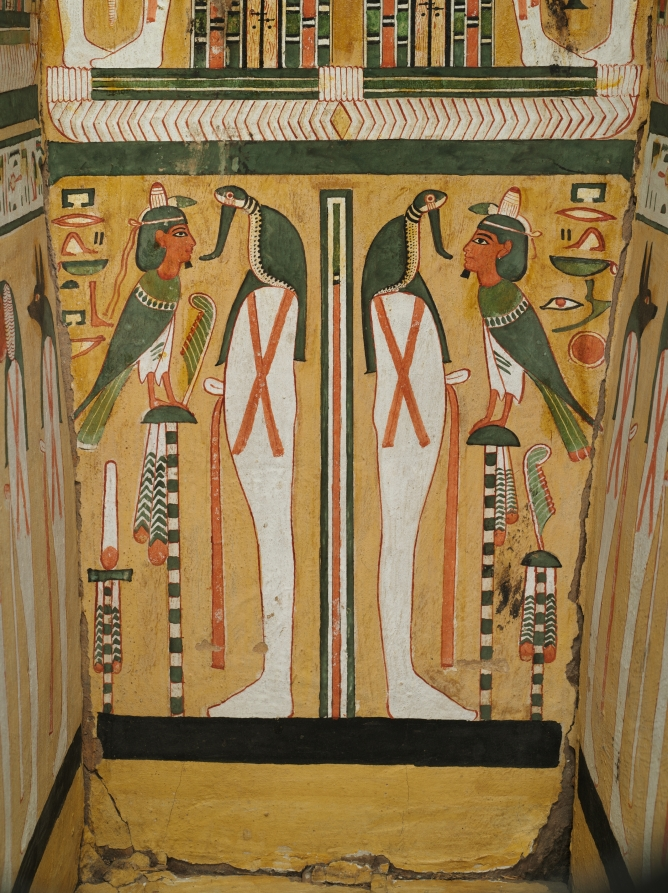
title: Coffin of Bakenmut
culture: Egypt, Thebes, Third Intermediate (1069–715 BCE), Dynasties 21–22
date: c. 1000–900 BCE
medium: gessoed and painted sycamore fig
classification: Funerary Equipment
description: The coffin of Bakenmut is one of the finest examples of painted wooden coffins made for the priests of Amen and their families at Thebes during Dynasty 21 and early Dynasty 22. The pharaohs of this time were no longer buried in the Valley of the Kings, but instead built tombs in the Delta, far to the north, where they resided. Security was lax in the Theban necropolis. The coffins and funerary goods of the wealthy citizens of Thebes were placed in unmarked and undecorated family tombs cut into the cliffs on the west bank of the Nile. All the care and detail that in more prosperous times were devoted to the decoration of the tomb chapel were now lavished on the elaborately painted coffins. Every available surface is crowded with religious scenes, images of funerary gods and goddesses, protective spells, and magical symbols. The deceased appears mummiform. An elaborate floral collar entirely covers the upper body, exposing only the separately attached hands (now lost). A pair of red "mummy braces" are crossed over the chest, their point of intersection marked by a winged sun disk. The lower body is covered with tiny figures modeled in gesso against a yellow background, which gives the effect of gold inlaid with glass or semiprecious stone. The decoration on the interior features two deified dead kings of Dynasty 18. Although these rulers had lived centuries before, memory of their greatness was still very much alive. The main scene near the top depicts Tuthmosis III, the great military pharaoh, who lived 500 years before Bakenmut. Posed as a mummy, the ruler wears a brilliant feathered garment enfolding him with falcon’s wings. The scene below features back-to-back seated images of Amenhotep I, regarded as the patron of the Theban cemetery and worshiped as a local god there.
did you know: Originally another smaller coffin was placed inside this outer coffin and in that the deceased with a mummy board would have rested.